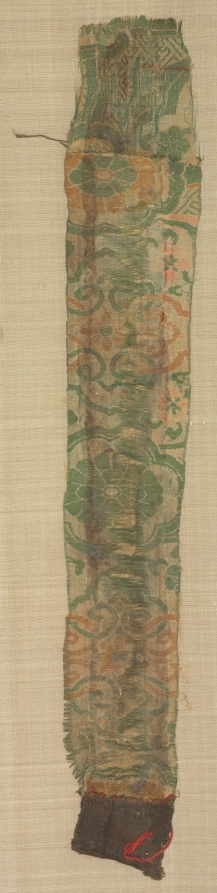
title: Vajrapani Embroidered Mount with Garuda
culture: China and Tibet, Embroidery: China, Yuan dynasty (1279-1368); painting: Tibet, 17th century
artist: Choying Dorje, the Tenth Black Hat Karmapa (Tibetan, 1604–1674)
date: painting 1600s, embroidery c. 1300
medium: Opaque watercolor, gold, and silver on silk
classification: Embroidery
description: The painting depicts the Buddhist protector who holds (pani) the thunder bolt (vajra) in his right hand. He kneels in reverence and holds his left hand in a gesture of salute. This unusual image appears to have been the vision of a Tibetan monastic patriarch known for creating his own inventive paintings and sculptures. Sewn to the painting are Chinese damask borders and rare embroideries dating to the Chinese Yuan dynasty (1279–1368). They depict man-eagle figures known as Garuda, a form occasionally assumed by Vajrapani.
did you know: Vajrapani sometimes takes the form of Garuda, enemy of snakes.